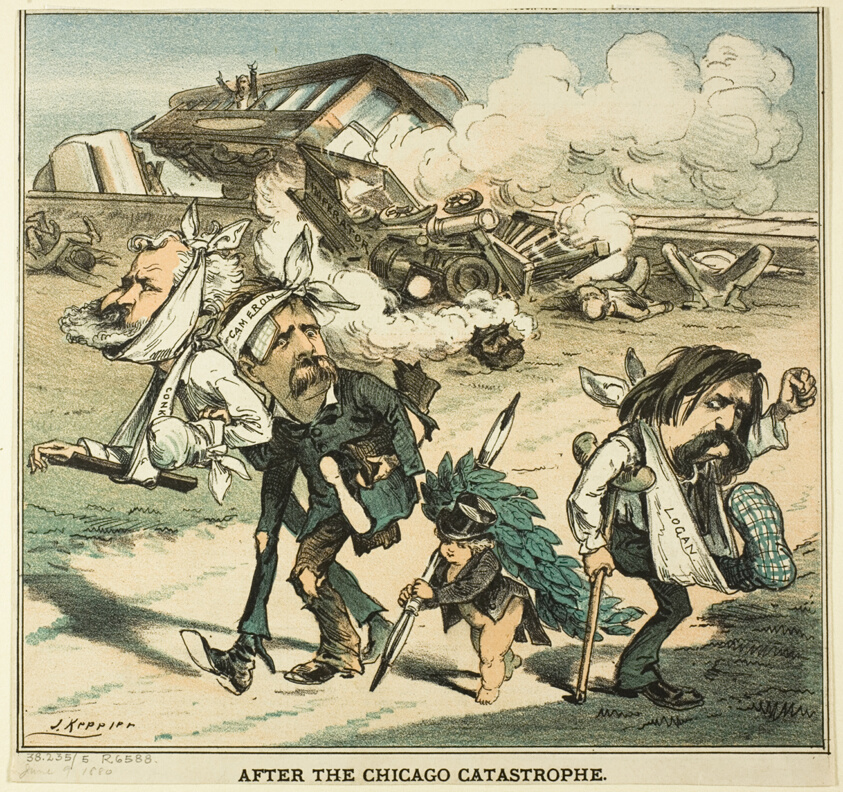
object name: Print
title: After the Chicago Catastrophe, from Puck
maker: Joseph Keppler (American, 1638-1894)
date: 1880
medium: Color lithograph on newsprint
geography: United States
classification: lithograph; print; prints and drawing